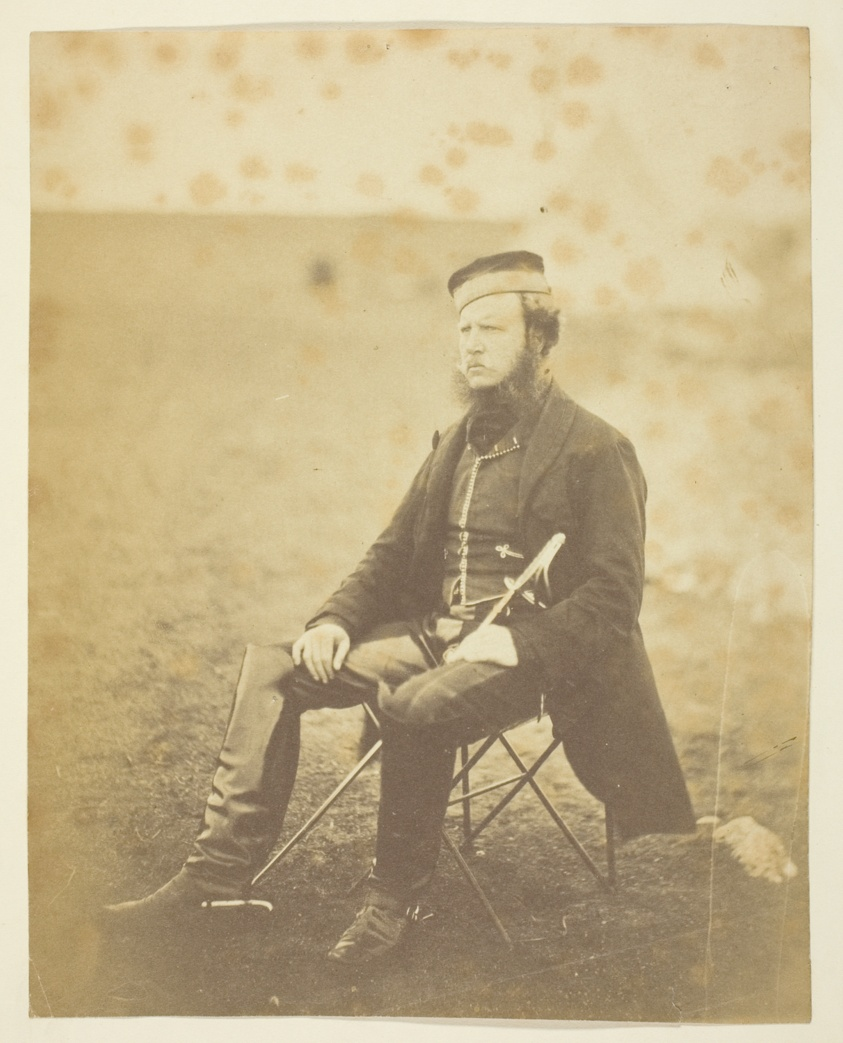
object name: Photograph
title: Sir John Miller Adye (1819-1900), General; taken at the Crimea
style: 19th century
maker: Roger Fenton (English, 1819–1869)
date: 1855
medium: Thinly albumenized print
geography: England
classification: albumen silver print; photographic process; photography; photograph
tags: Collected by Hugh Edwards